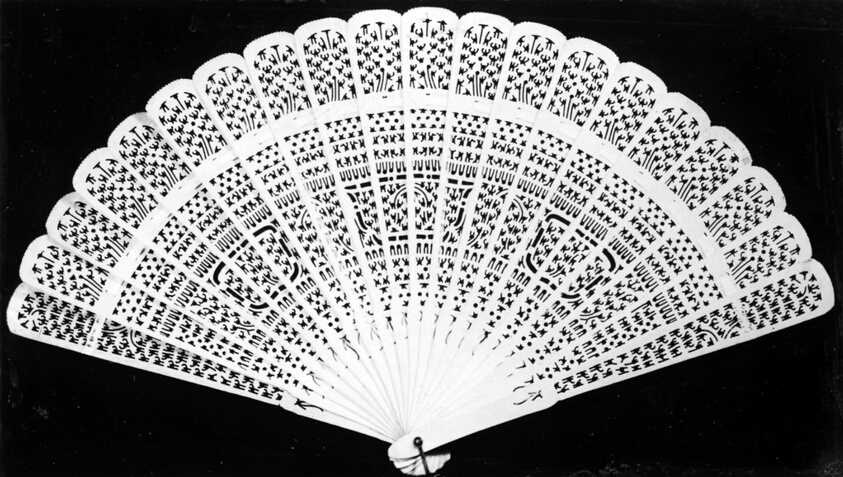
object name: Costume and Accessories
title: Fan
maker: India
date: 19th century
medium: Pierced bone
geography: India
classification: textile; fan - misc; costume accessory; costume accessory - folding fan; costume